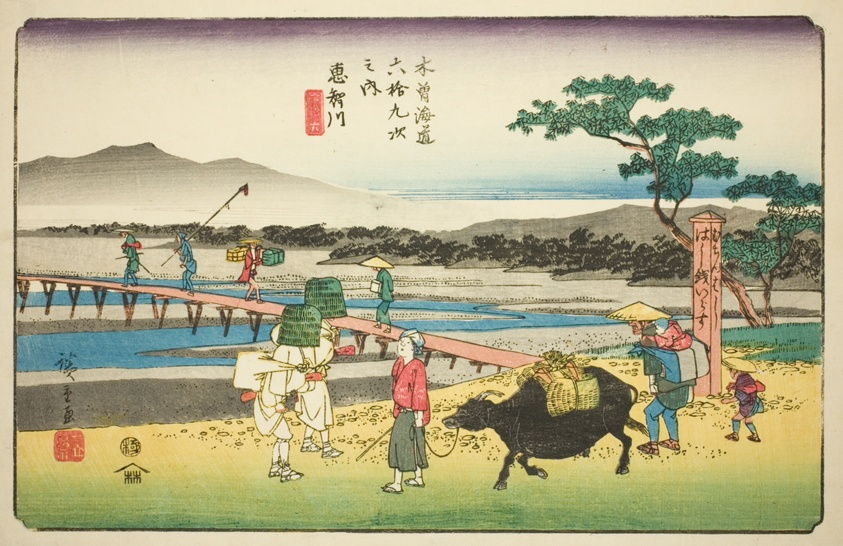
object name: Print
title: No. 66: Echikawa, from the series "Sixty-nine Stations of the Kisokaido (Kisokaido rokujukyu tsugi no uchi)"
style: Japanese (culture or style)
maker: Utagawa Hiroshige 歌川 広重; Japanese, 1797-1858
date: c. 1835/38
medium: Color woodblock print; oban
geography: Japan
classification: woodblock print; print; asian art